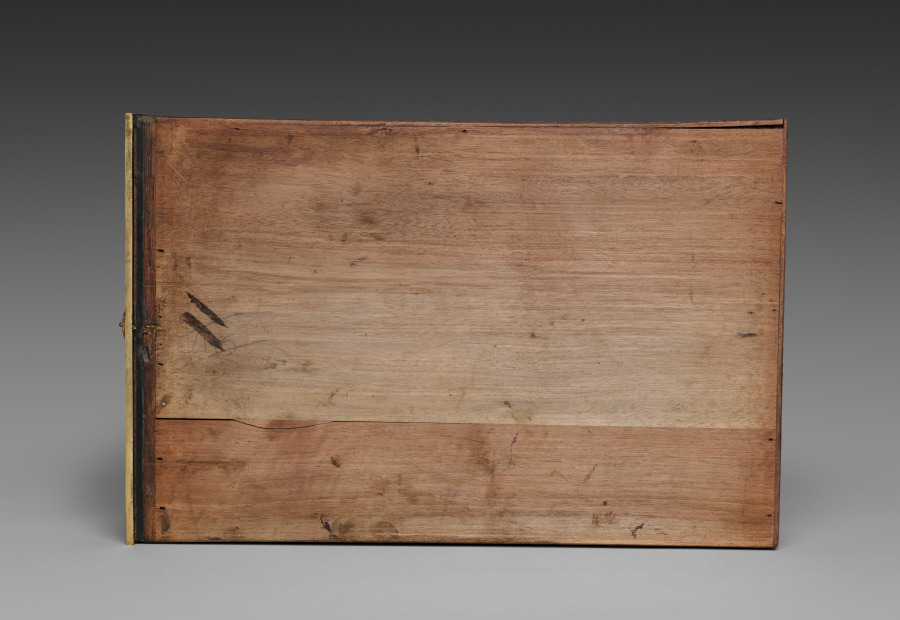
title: Side Drawer for Cabinet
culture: France, late 17th Century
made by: André-Charles Boulle (French, 1642–1732)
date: c. 1690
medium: ebony, marquetry in metal and tortoise shell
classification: Furniture and woodwork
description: Appointed cabinetmaker to King Louis XIV in 1672, André-Charles Boulle became a master of furniture making in France during the late 1600s until his death in 1732. Known primarily for his use of marquetry, in which metal patterns are inlaid into tortoiseshell then applied within the veneered surface of the furniture, Boulle established a level of quality and craftsmanship few others could achieve. As a result, his work found favor at the royal court and among other aristocrats and diplomats eager to impress the king. The inclusion of a medallion depicting Louis XIV within the bronze decoration of this chest would have identified the owner with the royal court. Often exhibiting stout architectural proportions with elegant groups of inlaid motifs such as the parrot on the central panel of this chest, Boulle’s designs are an example of the intellectual fashion for contrasting ideas, materials, and motifs.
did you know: Originally designed to sit atop an elaborate tall stand, this chest was likely altered in the late 1700s to reduce its scale and height.